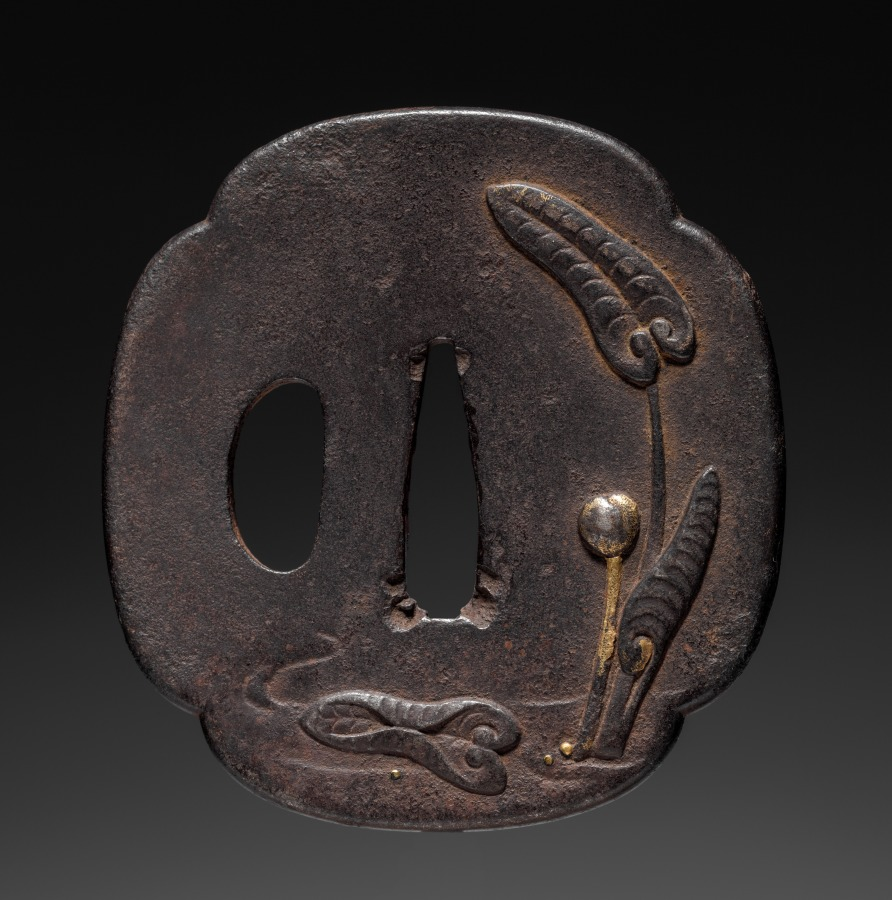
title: Sword Guard (Tsuba)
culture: Japan, possibly Edo period (1615-1868)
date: c. 1615–1868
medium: iron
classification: Arms and Armor